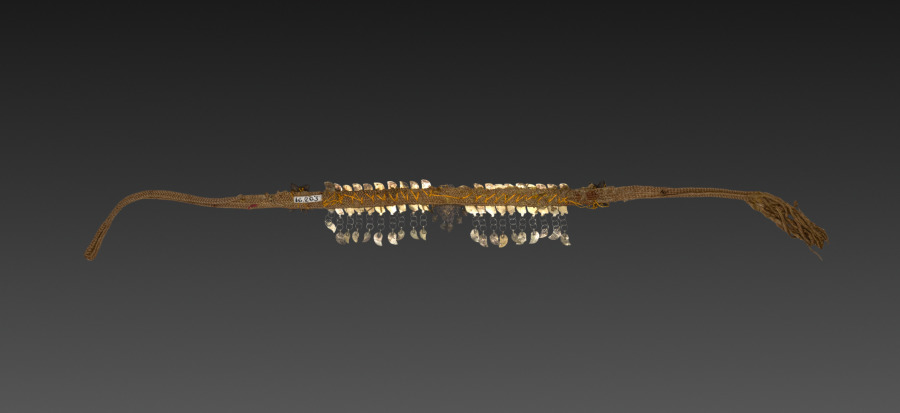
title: Armlet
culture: Silesia, 19th century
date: 1800s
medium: silver gilt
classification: Jewelry